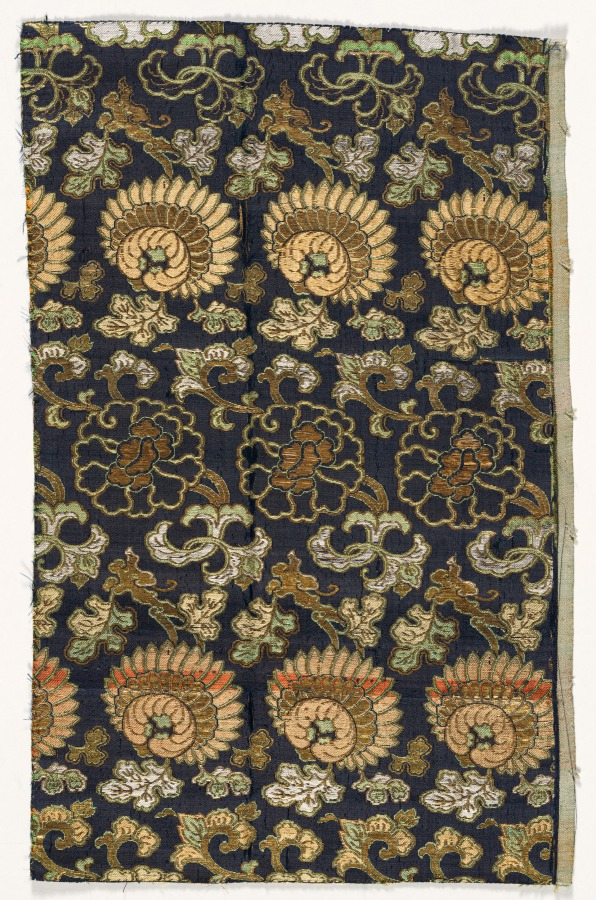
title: Fragment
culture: Japan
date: 1800s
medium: silk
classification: Textile